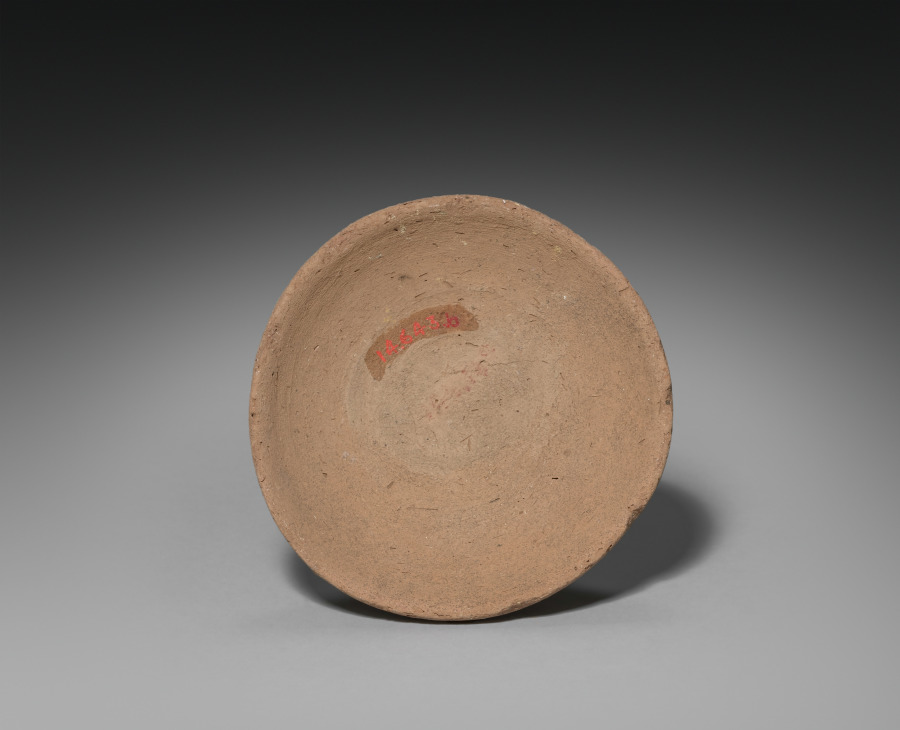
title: Shawabty Jar with Lid (lid)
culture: Egypt, New Kingdom (1540–1069 BCE), Dynasties 19–20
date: 1295–1069 BCE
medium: Nile silt ware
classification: Funerary Equipment